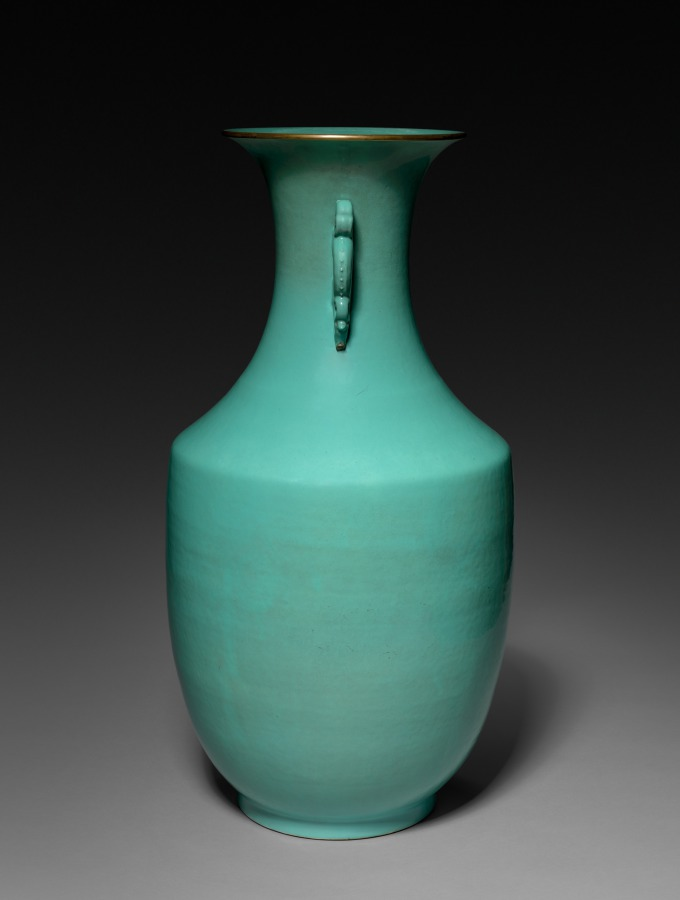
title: Vase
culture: China, Qing dynasty (1644–1911), Qianlong reign (1736–95)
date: 1736–95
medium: porcelain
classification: Ceramic